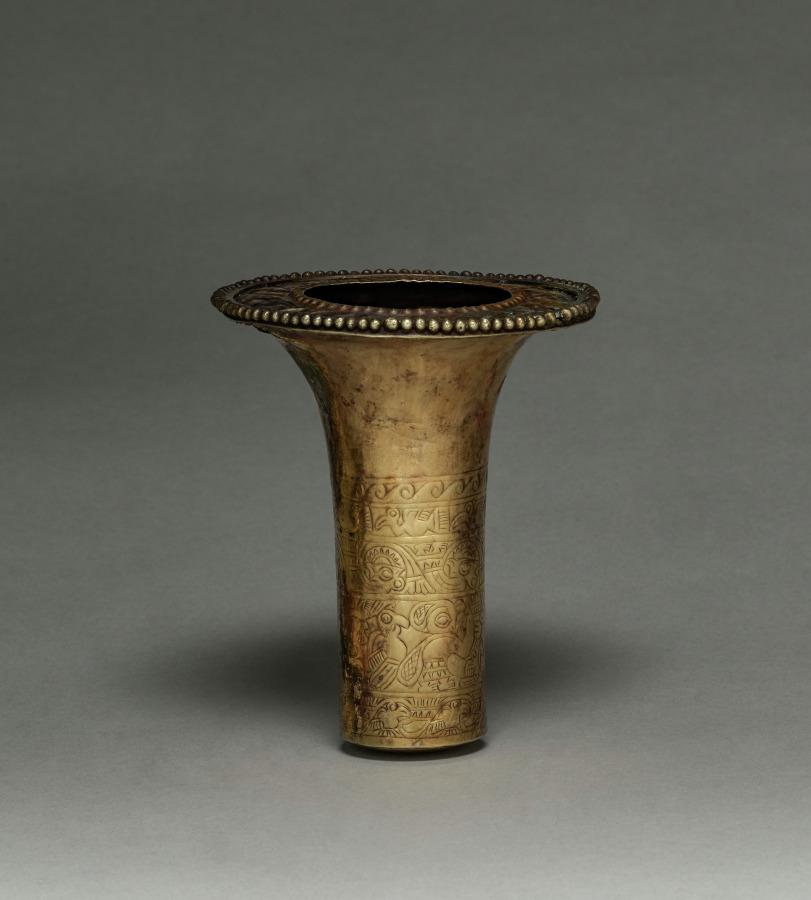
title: Ear Flare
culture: Peru, North Coast, Chimú style (900-1470)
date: 900–1470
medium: hammered gold alloy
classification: Metalwork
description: North Coast ear ornaments typically have a long shaft that balanced the weight of the glorious frontal. This pair illustrates Chimú interest in the sea, which had great economic and religious importance. On the shafts are bands of seabirds and waves, and a similar pattern edges the frontals, which were altered in modern times. Originally solid disks, the frontals' centers were cut out and a dotted band was added to the rim.